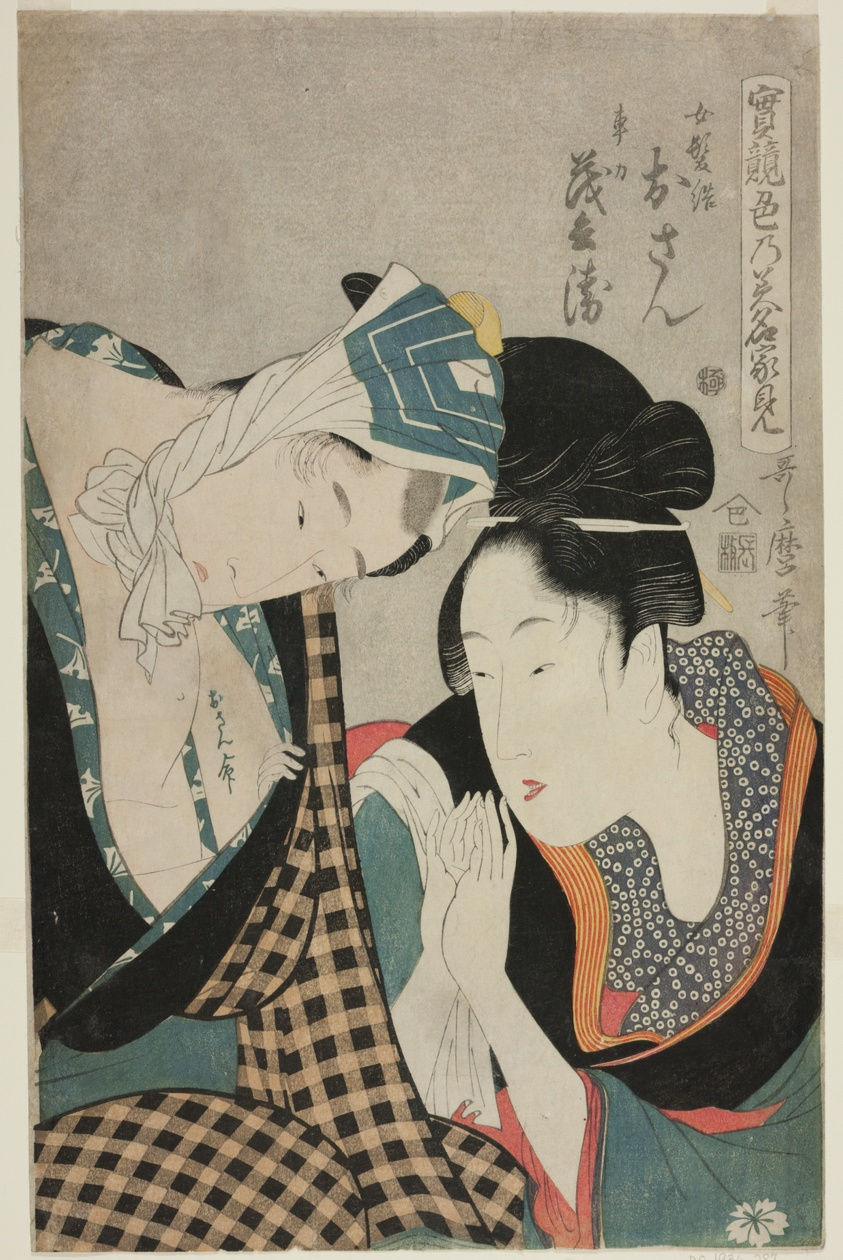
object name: Print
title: A Test of Skill - the Headwaters of Amorousness (Jitsu kurabe iro no minakami): Osan and Mohei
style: Japanese (culture or style)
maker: Kitagawa Utamaro 喜多川 歌麿; Japanese, 1753 (?)-1806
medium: Color woodblock print; oban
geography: Japan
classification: woodblock print; print; asian art